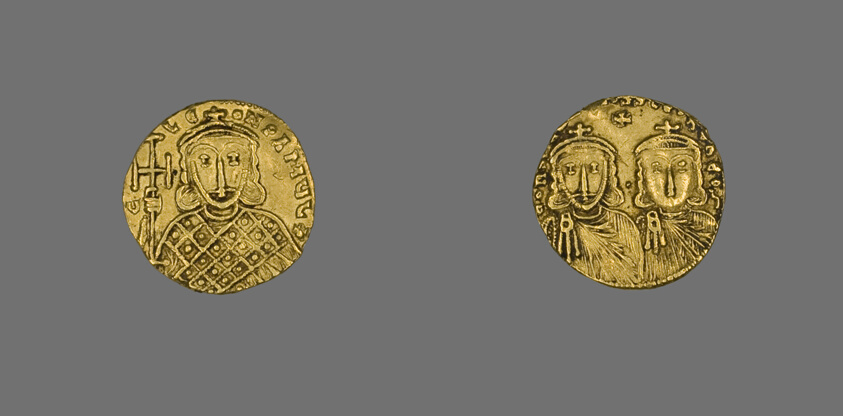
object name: Coin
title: Solidus (Coin) of Constantine V and Leo IV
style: byzantine, european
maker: Byzantine, minted in Constantinople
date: 751-775 (reigned 741–775)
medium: Gold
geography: Byzantine Empire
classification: coin; ancient art